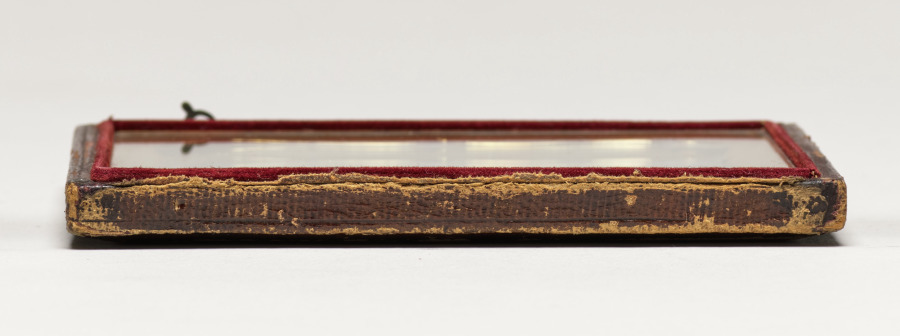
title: Two Children with Toys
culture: America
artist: Unidentified Photographer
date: c. 1855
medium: daguerreotype, quarter-plate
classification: Photograph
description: Children have always been particularly cherished subjects for photography. Portraits were made to preserve the memory of their stages of growth and, in an age when long-distance travel was rare, to share with faraway relatives. And, for a sadder reason: in 1840 an estimated one-third of children died before age five. Photography offered grieving parents the opportunity to immortalize their children’s features. This tragic genre of photographs, later called “post-mortems,” often depicts the children in fine clothing, laying down with eyes shut, as if merely napping.